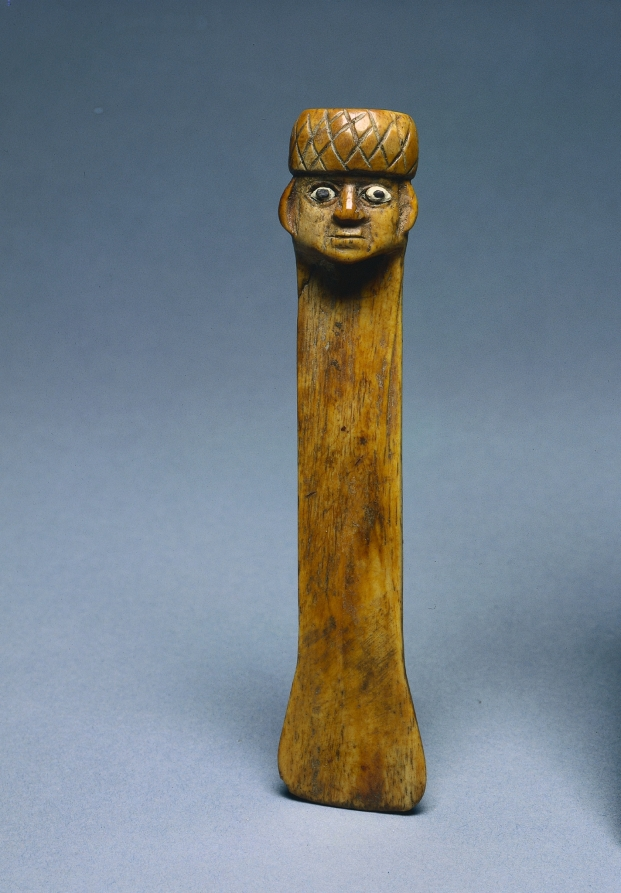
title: Spatula with Carved Head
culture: Peru, Wari style (500-900)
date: 500–900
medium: bone with shell inlay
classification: Jewelry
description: Peruvian Indians today regard coca leaf as a sacred substance that creates communion with supernatural forces. The leaves are chewed with powdered lime that in antiquity was stored in containers and scooped with spatulas like those seen here. Aside from its ritual meaning, coca has practical benefits: it is vitamin-rich; like coffee, it induces clear-headedness; and it increases stamina. The lizard spatula is Nasca in style; the other is Wari.